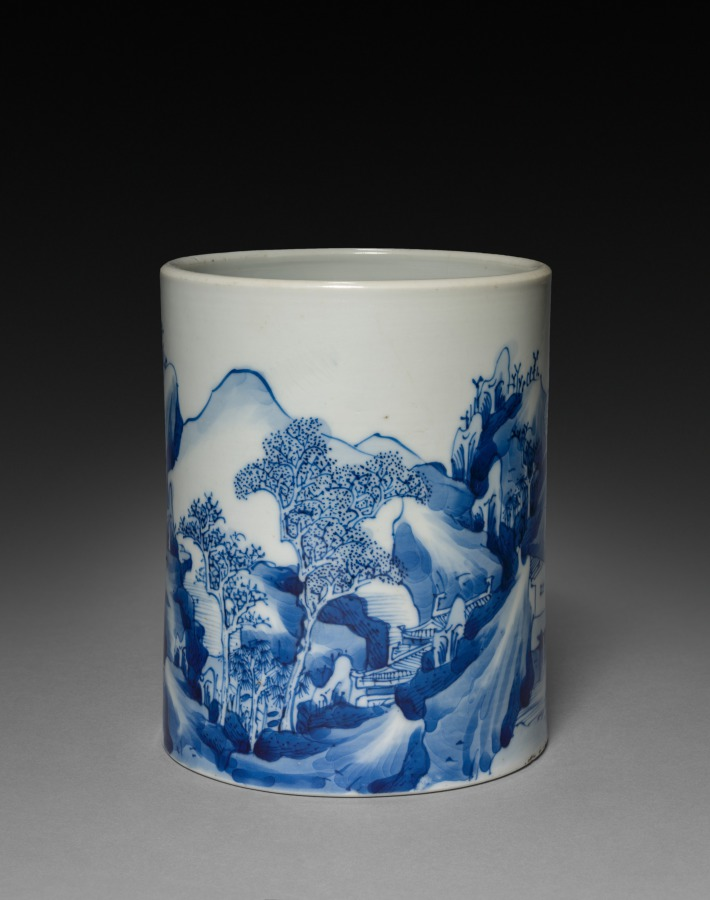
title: Brush Pot with Landscape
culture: China, Jiangxi province, Jingdezhen kilns, Qing dynasty (1644-1911), Kangxi reign (1662-1722)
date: 1662–1722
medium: porcelain with underglaze blue decoration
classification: Ceramic